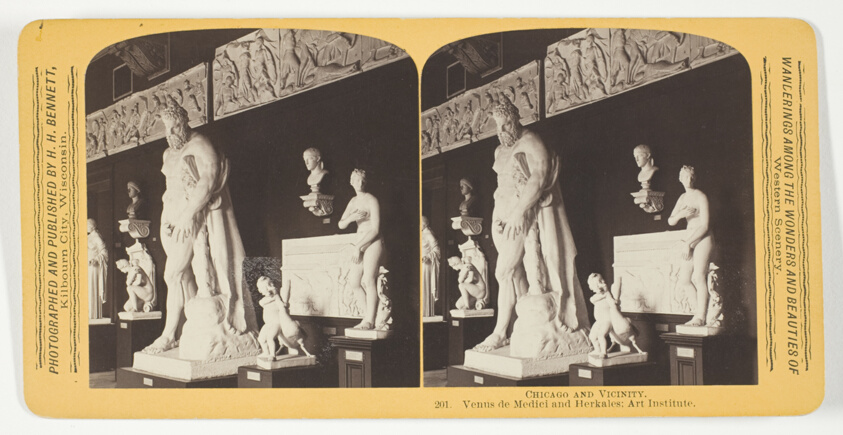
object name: Photograph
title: Venus de Medici and Herkales; Art Institute, from the series "Chicago and Vicinity"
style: 19th century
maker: Henry Hamilton Bennett (American, born Canada, 1843-1908)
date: 1893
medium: Albumen print, stereo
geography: Chicago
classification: photography; photograph; albumen silver print; stereograph (albumen)